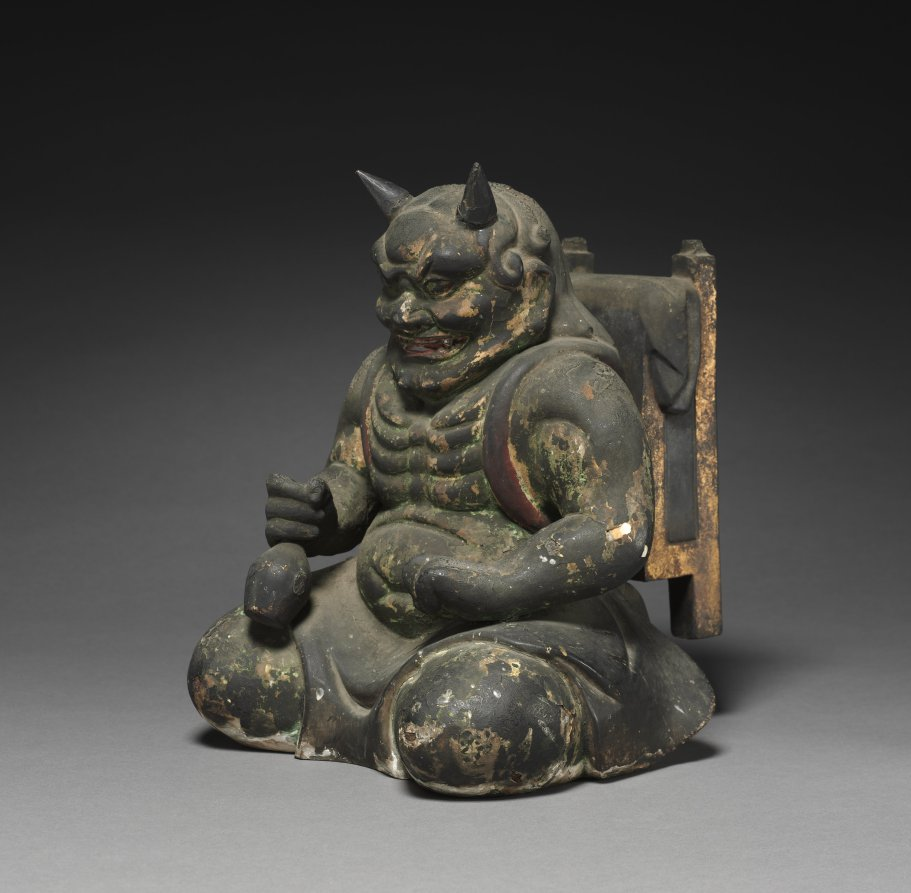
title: Seated Koki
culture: Japan, Muromachi period (1392–1573)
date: 1400s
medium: wood with pigment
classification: Sculpture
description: The axe-wielding red Zenki, and the vase-holding, bamboo backpack-wearing green Koki are both under the mystical control of the monk, En no Ozunu (legendarily 634–701), also known as En no Gyōja, or “En the Ascetic,” considered to have founded Shugendō, a style of religious practice focused on performing austerities in mountainous settings.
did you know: This sculpture was hand-carved and covered with gesso, then paint in green, white, red, yellow, orange, and black, and gilded in select areas.